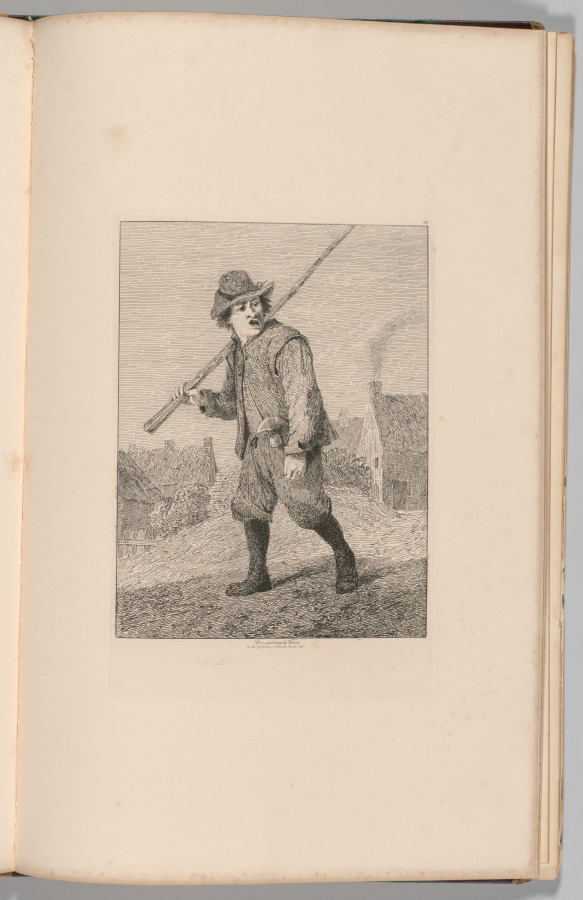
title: Liber Studiorum: Plate 46, Sketch after Teniers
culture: England, 19th century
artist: John Sell Cotman (British, 1782–1842)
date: 1838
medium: softground etching, from a bound volume containing 48 plates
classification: Bound Volume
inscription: In plate, above borderline, upper right: 46; in plate, within image: D; in plate, below image: After a painting by Teniers / in the possession of Darwen Turner, Esqr / Unfinished